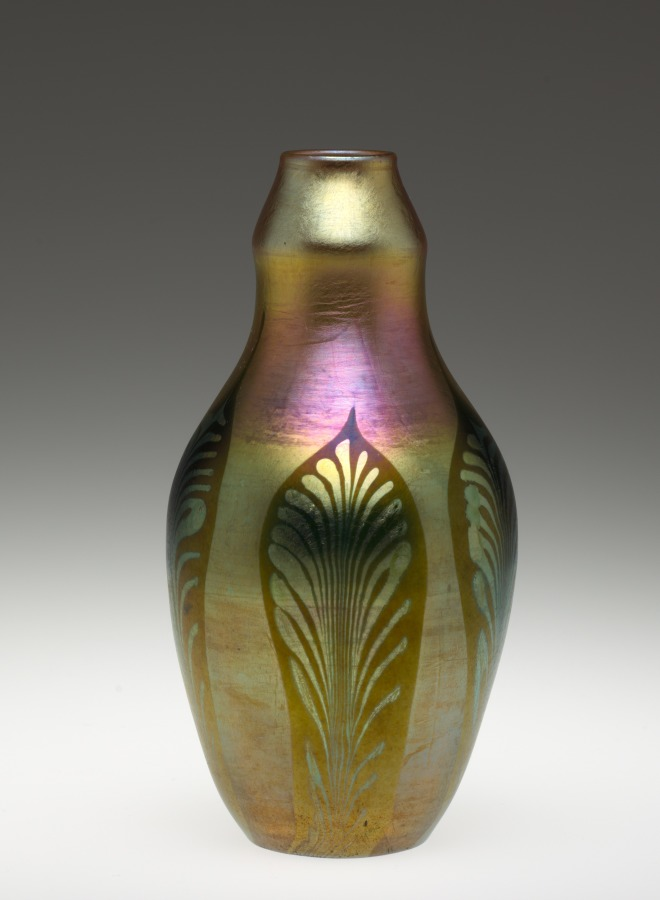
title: Vase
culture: America, New York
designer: Louis Comfort Tiffany (American, 1848–1933)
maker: Tiffany Glass & Decorating Company (America, New York, 1892–1902)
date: c. 1900–1902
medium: favrile glass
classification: Glass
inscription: etched on base: "L.C. Tiffany" and "4548E." Scratched on base "8169."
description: This small vase is made of Louis Comfort Tiffany's signature Favrile glass. Early on when Tiffany began collaborating with glass artists on new types of production, his aesthetic ambitions were realized in the development of Favrile glass, deliberately named to sound French, expensive, and “handmade.” Largely through Tiffany's marketing ability, Favrile glass became America’s greatest contribution to the Art Nouveau style. His works were exhibited at international expositions; galleries in major European cities, where his creations were bought by many museums; and in his store in Manhattan, known as the Tiffany Glass and Decorating Co., later Tiffany Studios. Along with the many shapes and sizes of his decorative vases, Tiffany used Favrile glass in mosaic panels, stained glass windows, and his artistic line of table and floor lamps.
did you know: Introducing various chemicals into the molten glass within the furnace produced multicolored iridescence on the surface when this vase was blown and cooled.